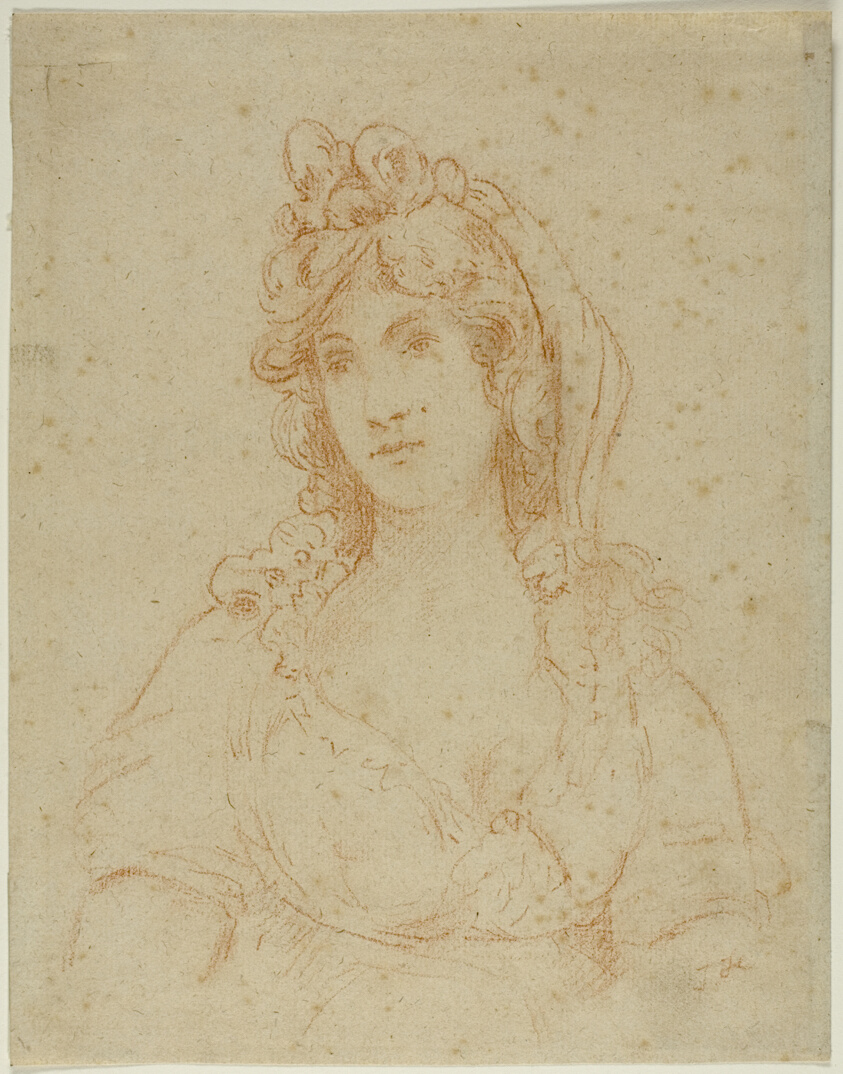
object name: Drawing and Watercolor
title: Portrait of Lady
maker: John Hoppner (English, 1758-1810)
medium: Red chalk on cream laid paper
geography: England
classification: chalk; drawings (visual works); prints and drawing